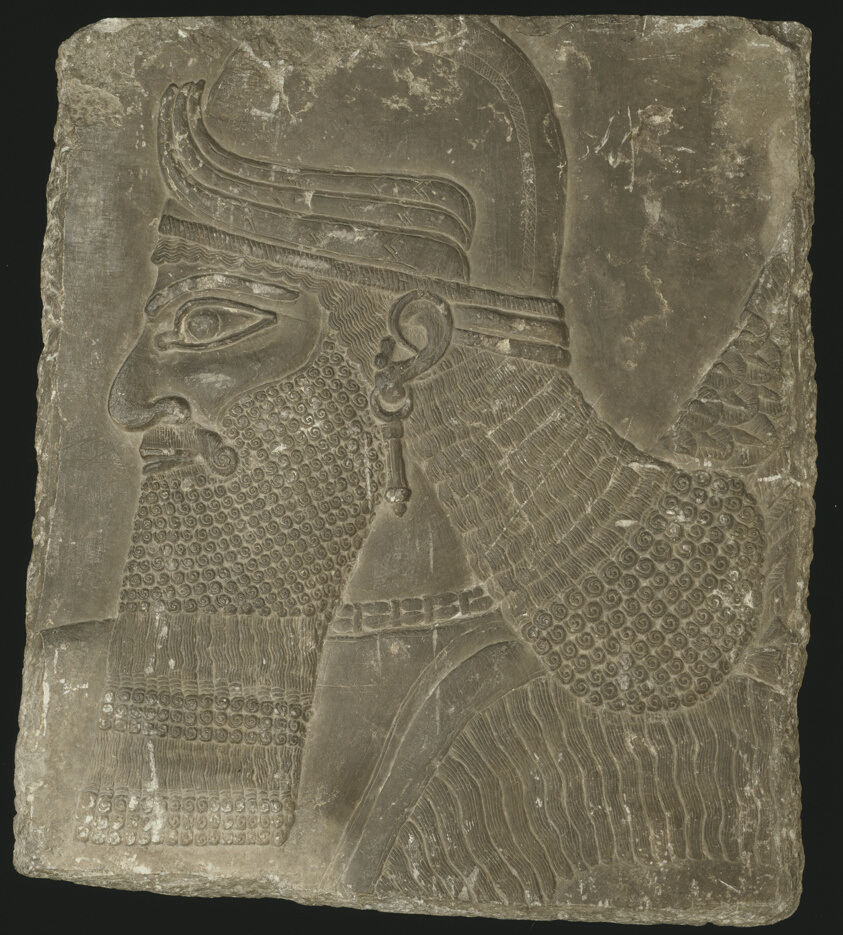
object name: Sculpture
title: Relief Showing the Head of a Winged Genius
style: late assyrian, assyrian, ancient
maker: Mesopotamian, Assyrian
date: Neo–Assyrian Period, reign of King Ashurnasirpal II (883–859 BCE)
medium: Gypsum relief with traces of pigment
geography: Nimrud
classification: stone; sculpture; ancient art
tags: goddesses, gods (deities)